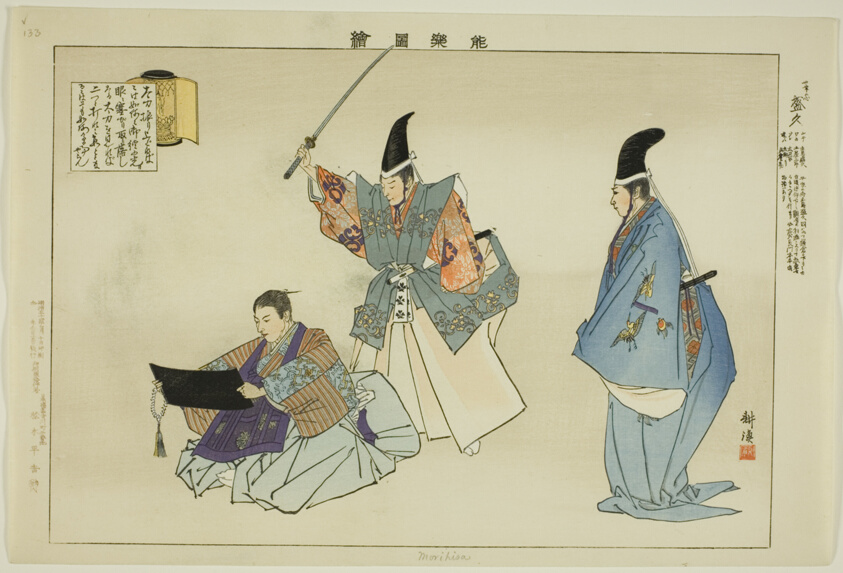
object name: Print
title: Morihisa, from the series "Pictures of No Performances (Nogaku Zue)"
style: Japanese (culture or style)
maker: Tsukioka Kogyo; Japanese, 1869-1927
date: 1898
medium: Color woodblock print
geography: Japan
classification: woodblock print; print; asian art